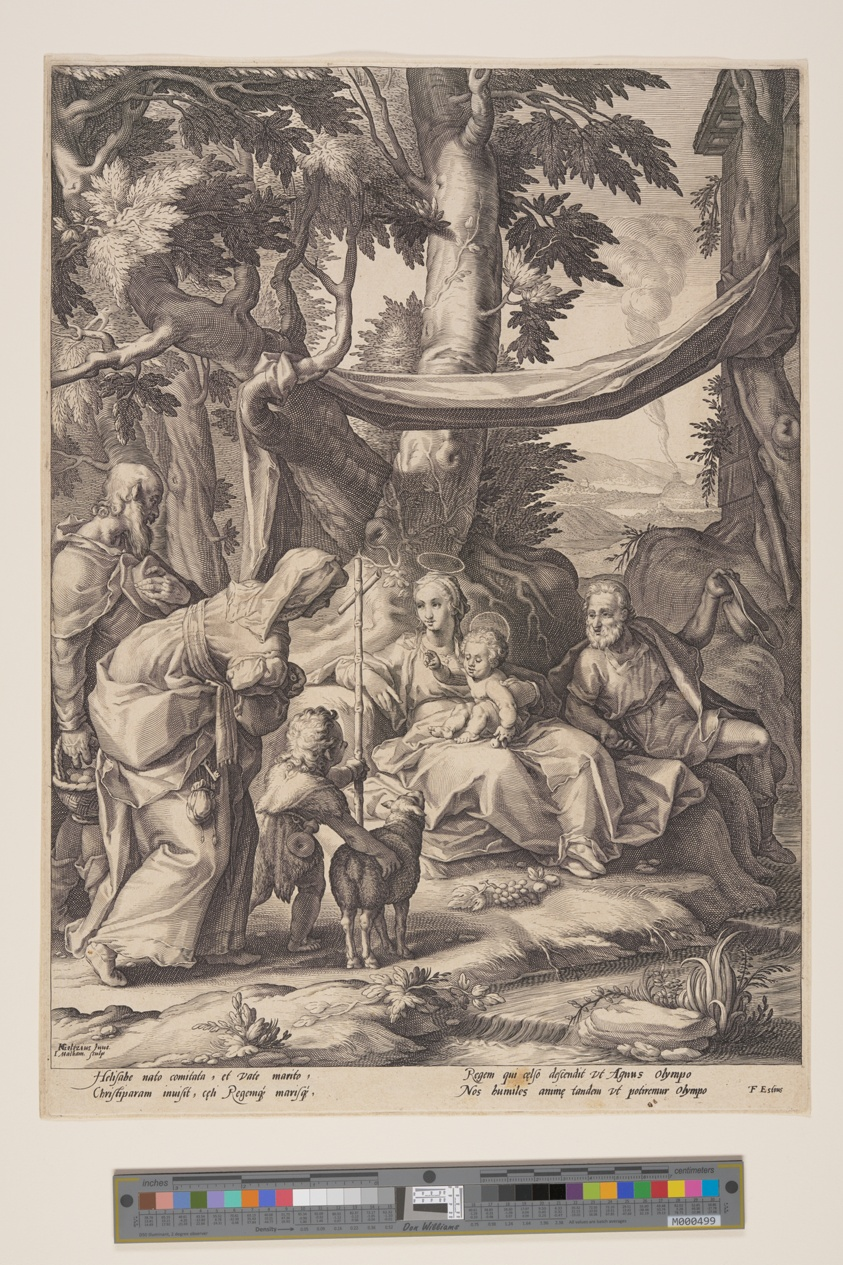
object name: Print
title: The Holy Family with Saints Elizabeth, Zacharias and John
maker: Jacob Matham (Dutch, 1571–1631); after Hendrick Goltzius (Dutch, 1558–1617)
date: 1590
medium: Engraving on ivory laid paper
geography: Netherlands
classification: engraving; paper; print; prints and drawing